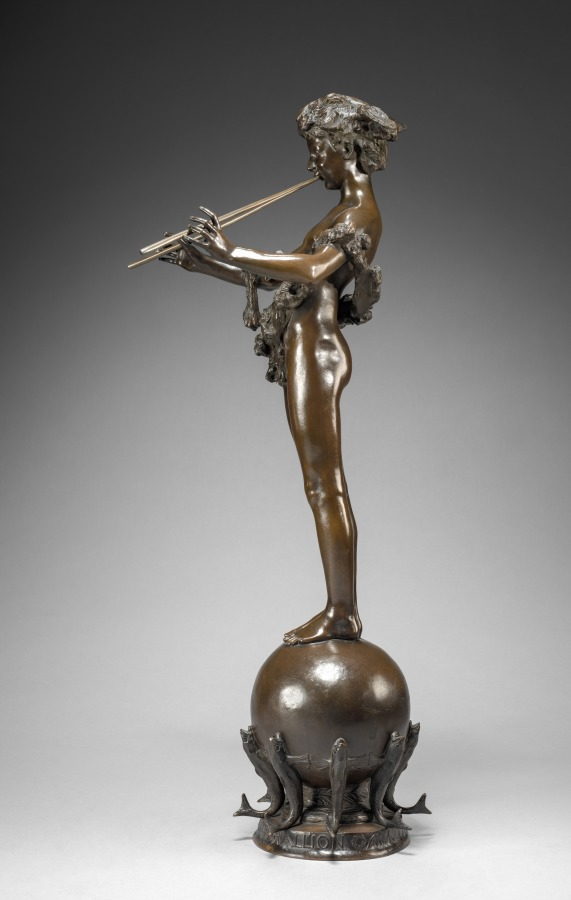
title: Pan of Rohallion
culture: America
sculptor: Frederick William MacMonnies (American, 1863–1937)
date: 1890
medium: bronze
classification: Sculpture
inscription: Signed on globe: Frederick MacMonnies, Paris 1890. © 1894. Inscribed around base: TO PAN OF ROHALLION ANNO DOMINI MDCCCLXL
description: Rohallion in the title refers to the name of an estate in New Jersey, whose owner commissioned MacMonnies to create a large fountain of this design for a garden pool. Later, the artist made several smaller versions, such as this example. Here, the ancient Greek god Pan plays his musical pipes while standing on an orb supported by fish.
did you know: The character of Peter Pan, including his flute playing, references the Greek god Pan.